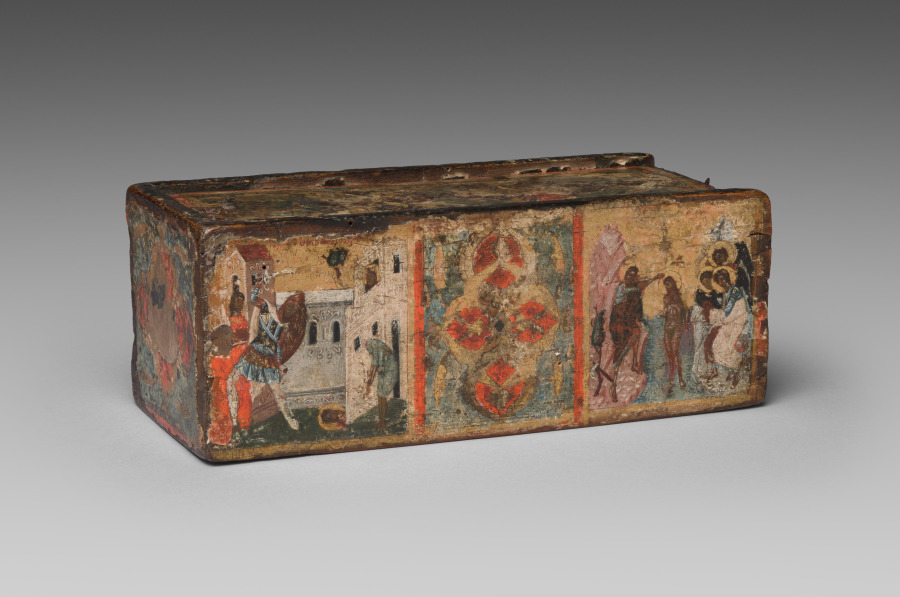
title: Reliquary Box with Scenes from the Life of John the Baptist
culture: Byzantium, Constantinople, late Byzantine period, 14th century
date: 1300s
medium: tempera and gold on wood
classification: Wood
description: John the Baptist--the first person to recognize Christ as the promised savior and the one who baptized him in the Jordan River--was one of the Byzantine Empire’s most revered saints. This box shows four scenes from the saint’s life: John’s martyrdom, Christ’s baptism, John’s birth, and the announcement of his birth to his parents. It probably once housed one of the saint’s relics; several were kept in churches and monasteries in Constantinople, including fragments of his skull and right arm and locks of his blood-clotted hair.